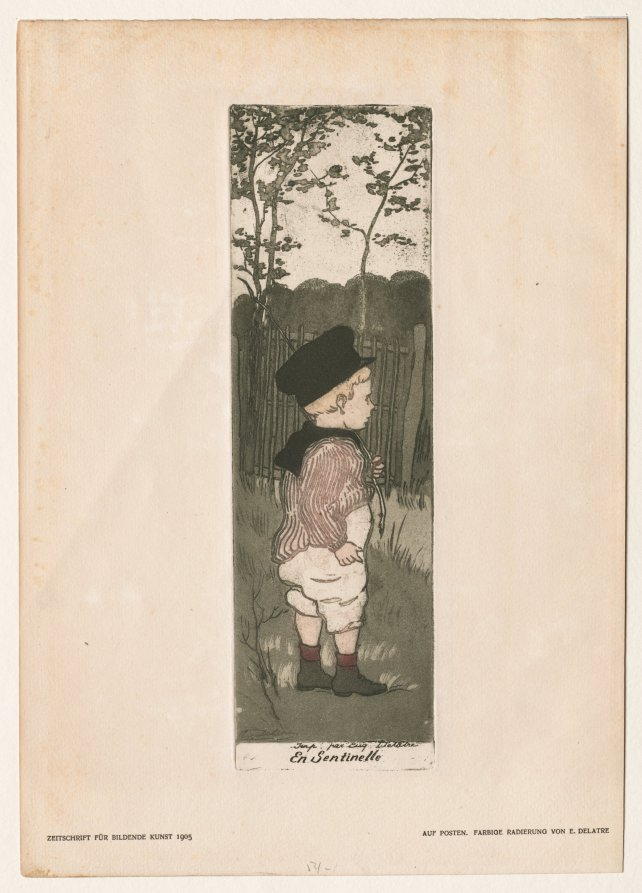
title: On Sentry Duty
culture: France, late 19th - early 20th century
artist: Eugène Delâtre (French, 1864–1938)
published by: Zeitschrift für Bildende Kunst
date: c. 1905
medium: color aquatint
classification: Print